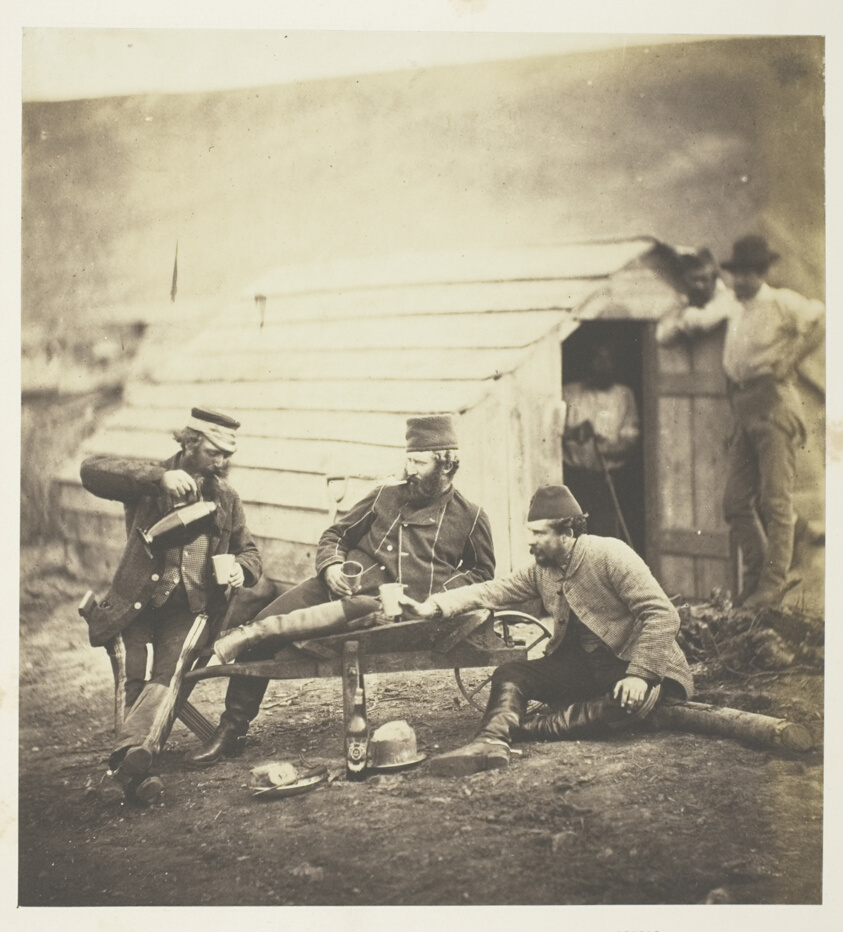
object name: Photograph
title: Hardships in the Camp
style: 19th century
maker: Roger Fenton (English, 1819–1869)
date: 1855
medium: Salted paper print, plate 40 from the album "Photographs Taken in the Crimea" (1856)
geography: England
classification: salted paper print; photographic process; photography; photograph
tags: Collected by Hugh Edwards, Crimea 1856